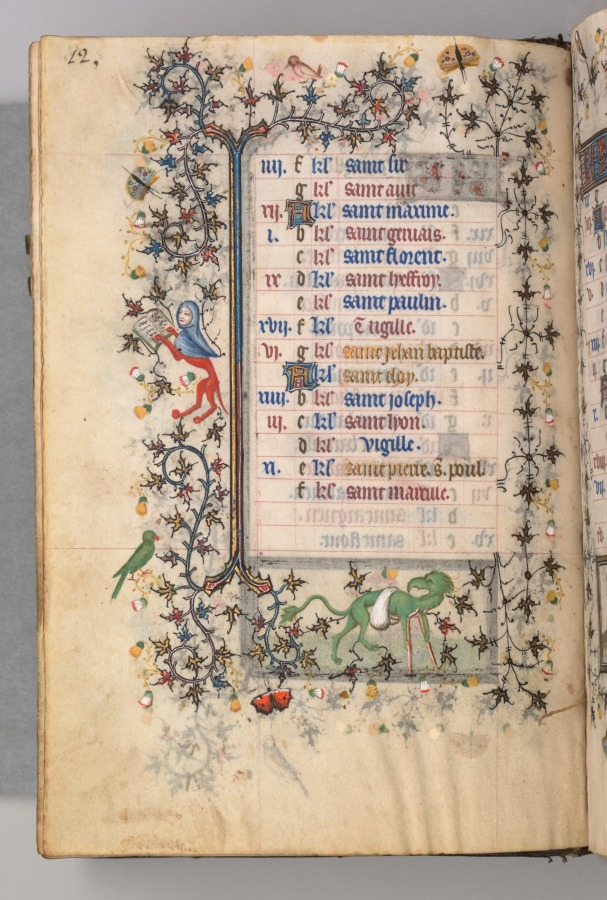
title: Hours of Charles the Noble, King of Navarre (1361-1425): fol. 6v, June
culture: France, Paris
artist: Master of the Brussels Initials and Associates (French)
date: c. 1405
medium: ink, tempera, and gold on vellum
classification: Bound Volume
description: This precious volume was obviously highly prized by its owner, the French-born King of Navarre, who had his coat of arms painted on no less than twenty folios. Rather than directly commissioning this manuscript from a specific workshop, it seems that Charles the Noble acquired his book of hours -- perhaps ready-made for the luxury market -- while on a trip to Paris in 1404-05. A collaborative effort, six painting styles are evidenced within the pages of this codex, those of two Italians, two Frenchmen, and two Netherlanders. The painter who was responsible for the planning and decoration of the book, and who produced seventeen of the large miniatures, was a Bolognese artist known as the Master of the Brussels Initials. His principal assistant, responsible for most of the borders, was a Florentine who signed his name "Zecho" da Firenze on folio 208 verso.